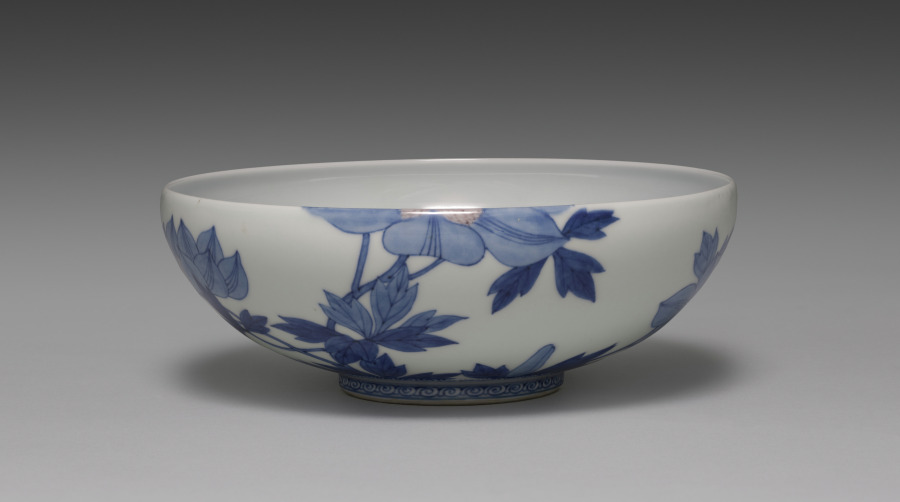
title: Dining Bowl with Clematis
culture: Japan, Meiji period (1868–1912)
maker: Seifū Yohei III (Japanese, 1851–1914)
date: 1893–97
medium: Porcelain with underglaze and overglaze colors, molded and incised designs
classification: Ceramic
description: The bowl is an especially well-executed example of Yohei III’s work in underglaze blue combined with other underglaze colors. This low-profile dining bowl has paintings of flowering clematis vines under the glaze in blue and red. Water is depicted with blue in the bottom of the bowl. The lines of white used to show motion on the water’s surface were created using either a reserve technique, where blue was omitted, or a masking technique, where parts of the surface were covered before applying the blue. A pair of butterflies flutters across one side. The foot is decorated with a pattern of spirals in blue, and the lip curves in slightly. The overall effect is one of seeing the flowering vine hanging down, hovering just above the surface of a pond, whose slight disturbances hint at unseen fish swimming below.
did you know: This bowl shows an environment painted in the round.